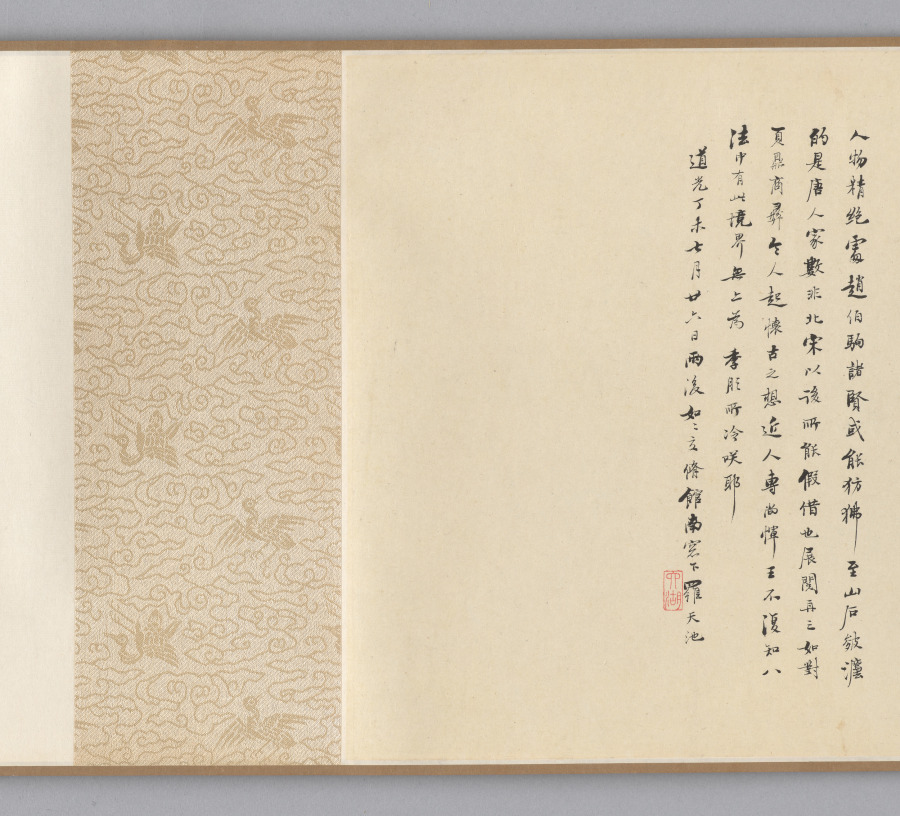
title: Waiting for the Moon in the Mid Autumn Festival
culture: China, Ming dynasty (1368–1644)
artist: Shi Rui (Chinese, c. 1400-c. 1470)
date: 1400s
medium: handscroll, ink, color, and gold on silk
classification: Painting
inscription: [印] 石氏以明; 游戯翰墨.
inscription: 僊山樓觀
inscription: 1 inscription, dated 1639, and 1 seal of Xiao Yuncong 蕭雲従 (1596-1673). Inscription by Xiao Yuncong: This is a painting by the Junior General Li. The painting is damaged and cracked at many places. Many of the paper strips for backing have been missing since long ago, but the colors are still fresh as if they had just been applied and the ink still looks moist. During the reign of Tianbao (742-756) of the Tang Dynasty, the Imperial Klansman Li Sixun was summoned to paint the walls of the Datong Hall. He was known as the "Senior General." His son, who came to be known as the "Junior General," was named Zhaodao. Of the stone epitaph [Li Sixun bei, or the "epitaph of Li Sixun," one of the best known calligraphic monuments of the Tang Dynasty], engraved with the calligraphy of Li Beihai 李北海 [Li Yong 李邕, 678-747], more than half has fallen off. Why, in contrast, was this painting able to survive? Or could it be that despite the fact that the stone is hard and the silk is soft, their preservation or destruction depends on some other factors? Moreover, since they were titled nobility of imperial descent, it is doubtful that they had the leisure and the mood to indulge in such decorative and descriptive blue and gold painting for the mere amusement of their fellow men. Recently, I read the Yi zhou ming hua lu 益州名畫錄 [by Huang Xiufu 黃休復, preface 1005]. I found a certain Li Chin-nu who compared himself with Li Zhaodao 李昭道 and was called by the Sichuan people the Junior General Li. In a painting which he did, entitled Mt. Ch'ing-ch'eng, the architectural structure of the pavilions, terraces, bridges, and boats are meticulous and accurate. The horsemen on a spring outing are as small as grain and the wild geese among the clouds as tiny as dust. It was also said that he painted on silk of any length in accordance to specific commissions. Is it possible that this painting is one of his? Since that time 700 years have passed. Yet one of the two Junior General Li's must be our painter. Formerly, there were the so-called "Four Excellents" in the Hall of Portraits of the Buddhist monk Wu-ta Kuo-shih: the [portrait] painting by Ch'ang Ts'an [act. ca. 881-888}, the calligraphy by Priest Tao-ying, the eulogy by Li Shangyin 李商隱 [813-858], and the landscape by Li Sheng [act. ca. 908-925]. This Li Sheng was styled Chin-nu and was also called Junior General Li. In the tenth month of the Chi-mao year, the twelfth year of the Chongzhen era [1639], recorded by Xiao Yuncong of Wuhu. trans. WKH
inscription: 4 colophons and 30 additional seals: 1 seal of Xu Qianxue 徐乾學 (1631-1694); 1 seal of Li Chien 黎簡 (1747-1799); 1 seal of Chang Chin-fang (18th c.); 2 seals of Sun Erzhun 孫爾準 (1770–1832); 1 colophon and 2 seals of Zhang Weiping 張維屛 (1780-1859); 1 seal of Wu Rongguang 吳榮光 (1773-1843); 1 colophon and 2 seals of Luo Tianchi 羅天池 (1826 jinshi); 7 seals of Wu Yanhui 伍元蕙 (active 1821–1851); 2 colophons and 4 seals of Pan Zhengwei 潘正煒 (1791-1850); 9 seals unidentified.